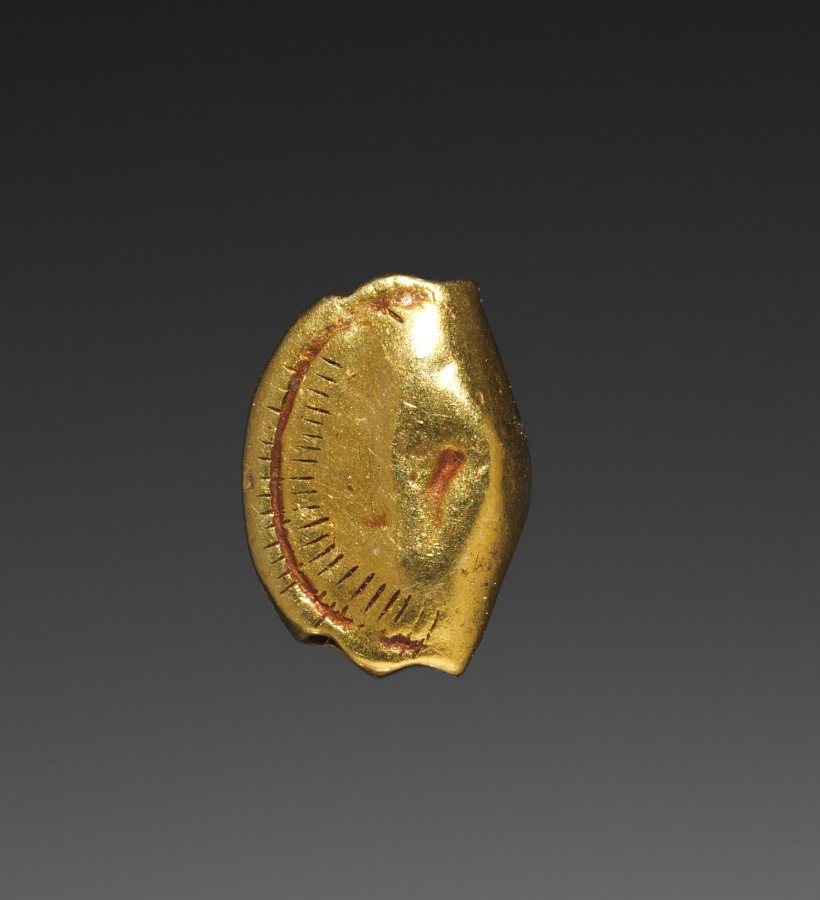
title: Wallet Beads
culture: Egypt, New Kingdom (1540–1069 BCE), Dynasty 18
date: 1540–1296 BCE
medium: gold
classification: Jewelry